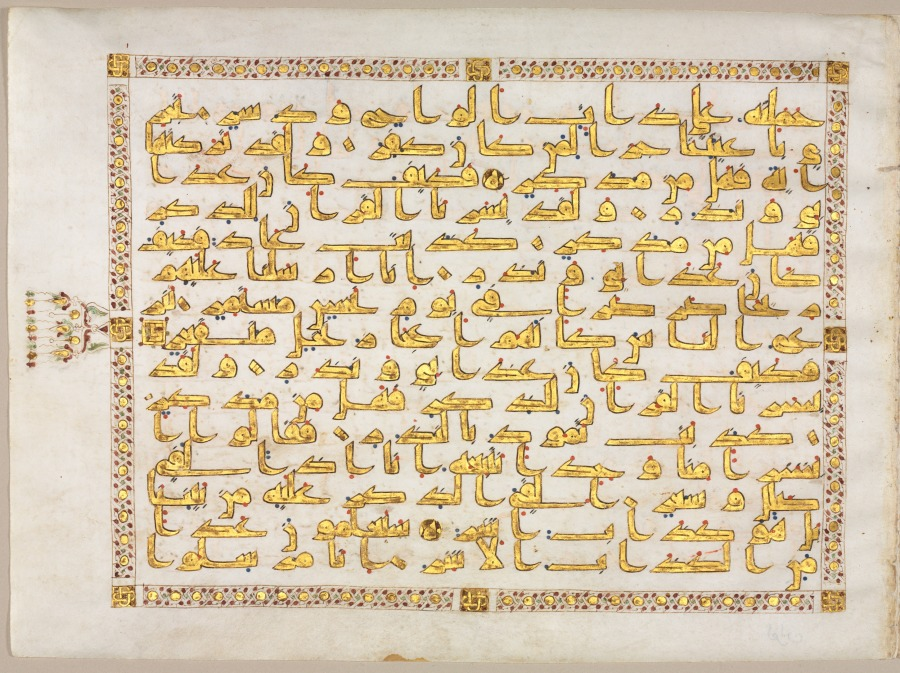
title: Qur'an Manuscript Folio (recto; verso); Left side of Bifolio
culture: North Africa, Aghlabid or Abbasid Period, 9th century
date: 800s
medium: gold, ink and colors on parchment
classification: Manuscript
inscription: Sura al-Qamar (54: 13-part 27). Script: Kufi (fifteen lines to a page)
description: Because of its connection with the Qur'an, calligraphy was elevated above all other art forms in the Islamic world. From an awkward and nearly illegible form of writing, Arabic script was transformed during the 600s and 700s to make it worthy of recording the Divine word. By the 800s, Muslim scribes were producing copies of the Qur'an that were true calligraphic masterpieces. This Qur'an, written entirely in gold, exemplifies the angular form of writing known as Kufic at its majestic best. The text on the right page is the opening of the Chapter of the Star (53: 1–21), which begins: "By the star when it plunges, your comrade is not astray, neither errs, nor speaks he out of caprice. This is naught but a revelation revealed, taught him by one terrible in power, very strong. . . ."